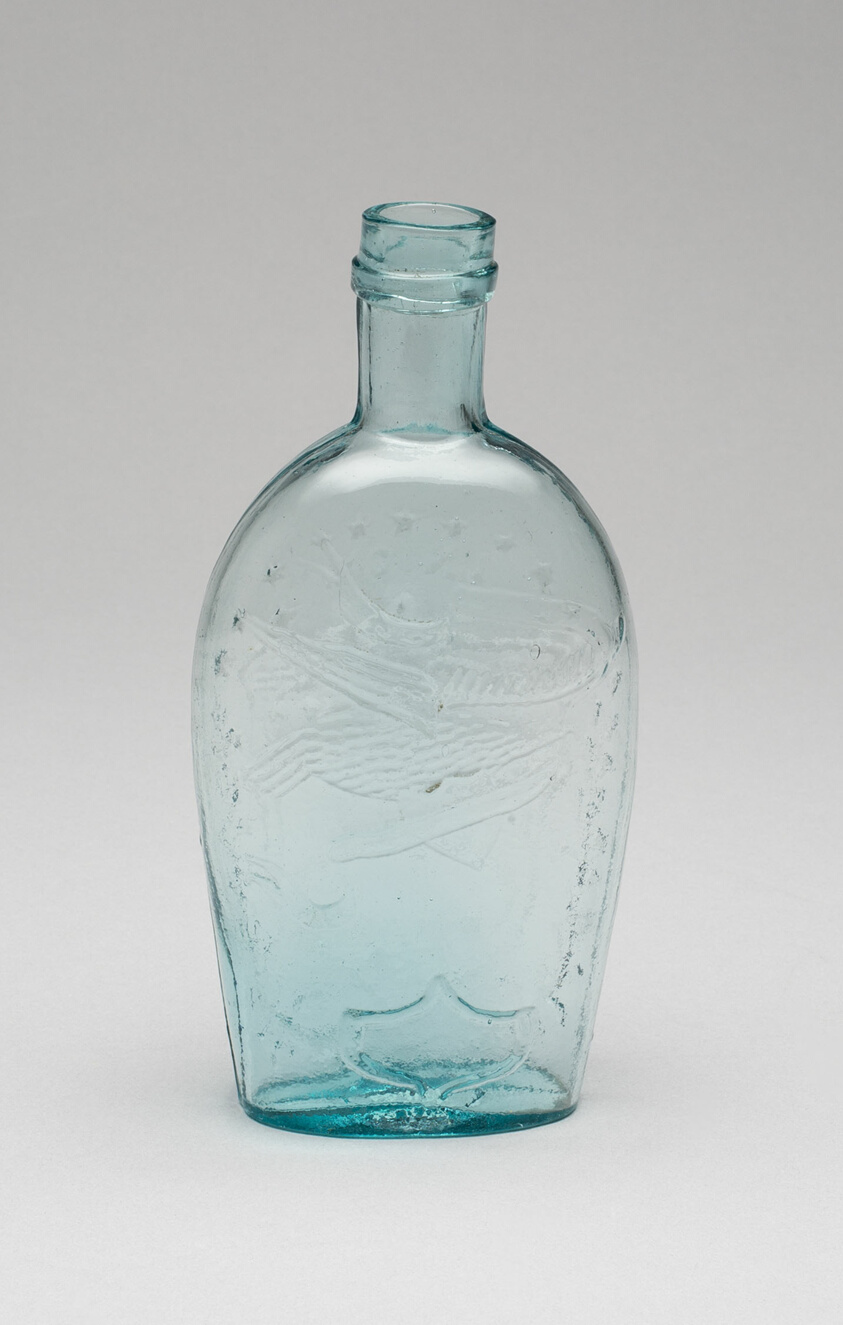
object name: Glass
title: Flask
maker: Artist unknown (American, 19th century); Probably Midwestern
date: 1860–75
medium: Glass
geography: Pittsburgh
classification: flask (bottle); glass; american decorative arts; american arts; decorative arts